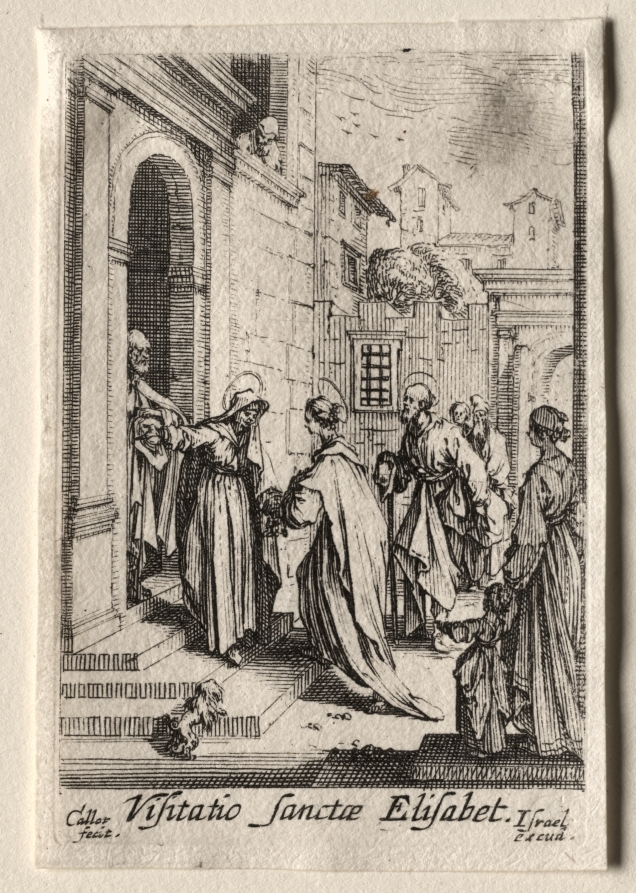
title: The Life of the Virgin: The Visitation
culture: France, 17th century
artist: Jacques Callot (French, 1592–1635)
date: ca. 1633–34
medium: etching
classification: Print